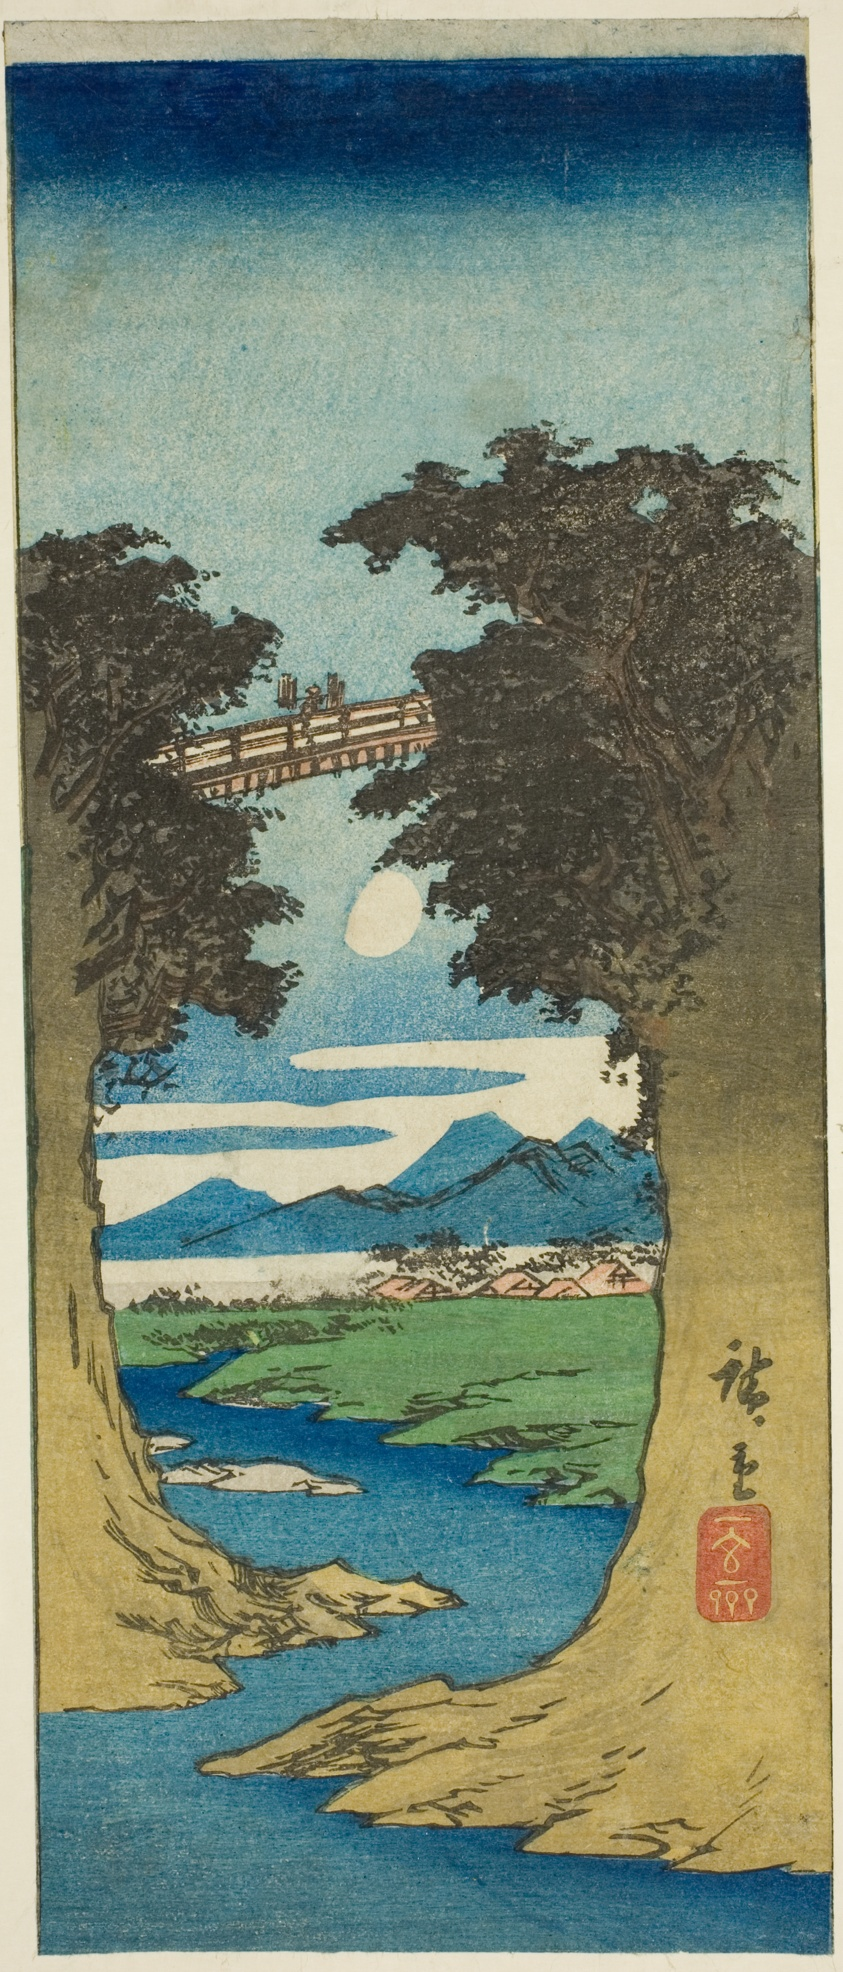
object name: Print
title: Monkey Bridge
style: Japanese (culture or style)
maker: Utagawa Hiroshige 歌川 広重; Japanese, 1797-1858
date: c. 1840/42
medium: Color woodblock print; section of harimaze sheet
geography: Japan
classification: woodblock print; print; asian art